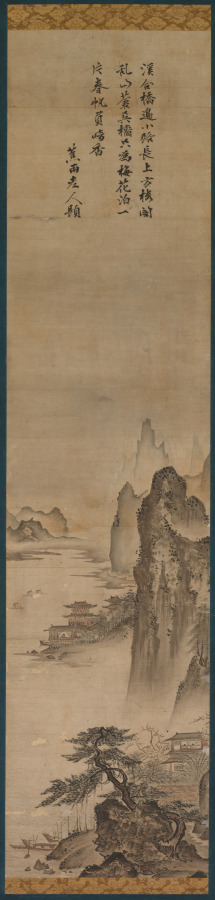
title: Landscape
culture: Japan, Muromachi period (1392–1573)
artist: attributed to Kenkō Shōkei (Japanese, active 1478–1506)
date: late 1400s–early 1500s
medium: hanging scroll, ink and light color on paper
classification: Painting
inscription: inscription above signed Shō'u Kojin; calligraphy by the Shokōji priest Tōgan Zuisen 桃源瑞仙 (1430–89)